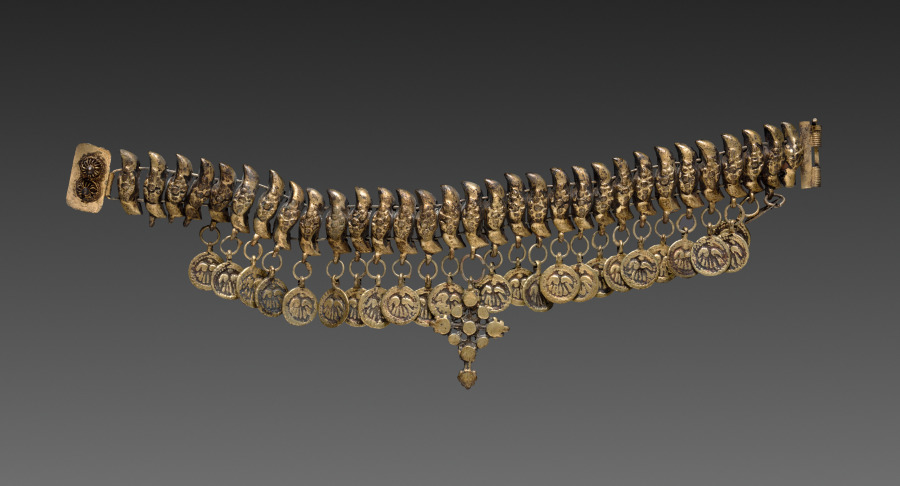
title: Bracelet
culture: Bulgaria, 19th century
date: 1800s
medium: brass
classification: Jewelry